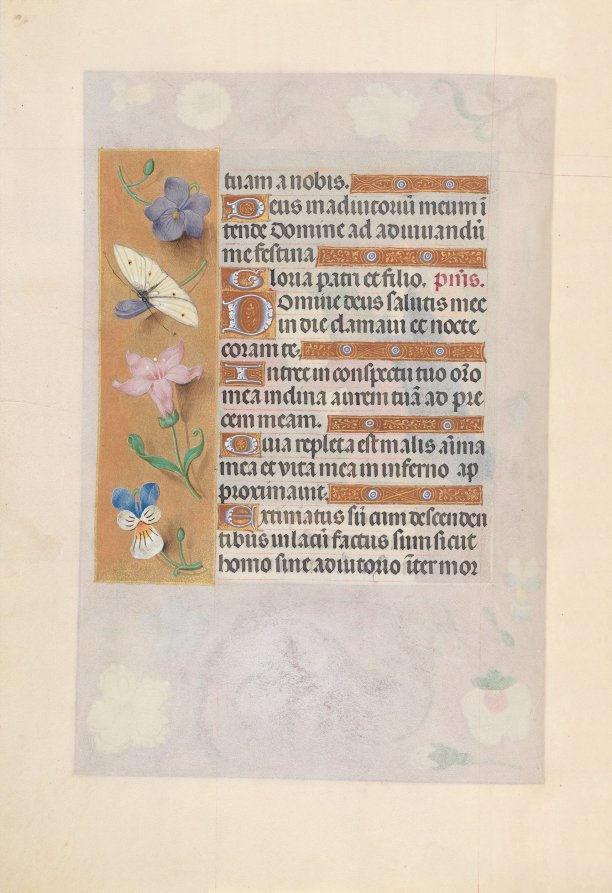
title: Hours of Queen Isabella the Catholic, Queen of Spain: Fol. 77v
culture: Flanders, Ghent and Bruges, late 15th century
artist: Master of the First Prayerbook of Maximillian (Flemish, c. 1444–1519)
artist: and Associates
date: c. 1500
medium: ink, tempera, and gold on vellum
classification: Bound Volume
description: This manuscript was illuminated by a circle of at least five highly organized manuscript painters active in the Flemish cities of Ghent and Bruges. The principal illuminator was Alexander Bening, who painted the majority of the book's miniatures. Manuscripts produced by this circle of artists are renowned for the decoration of their borders, which typically feature a rich variety of realistically-painted flowers, birds, and butterflies. This prayer book, called a book of hours, was intended not for a cleric, but for the private devotions of a lay person-in this case, Isabella the Catholic, Queen of Spain (1451-1504). Isabella's coat of arms embellishes the book's frontispiece. It is unlikely that the book was commissioned by the Queen herself; rather, she probably received it as a diplomatic gift from someone courting her patronage, perhaps Cardinal Francisco Jimenez de Cisneros. A Franciscan friar, Jimenez was dependent upon Isabella for his advancement, first to the post of Queen's confessor in 1492, and then to Archbishop of Toledo in 1495.